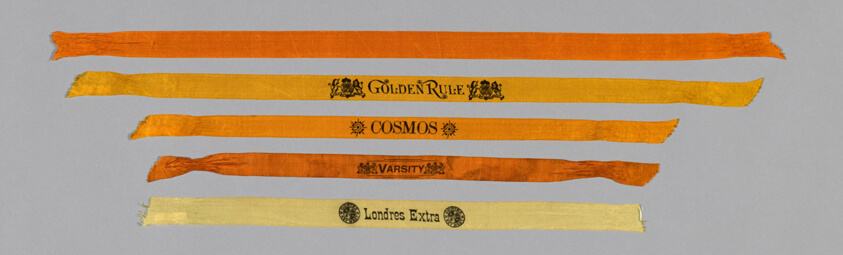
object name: Textile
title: Five Cigar Ribbons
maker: United States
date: 1880s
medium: Silk, plain weave; printed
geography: United States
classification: textile; weaving - printed